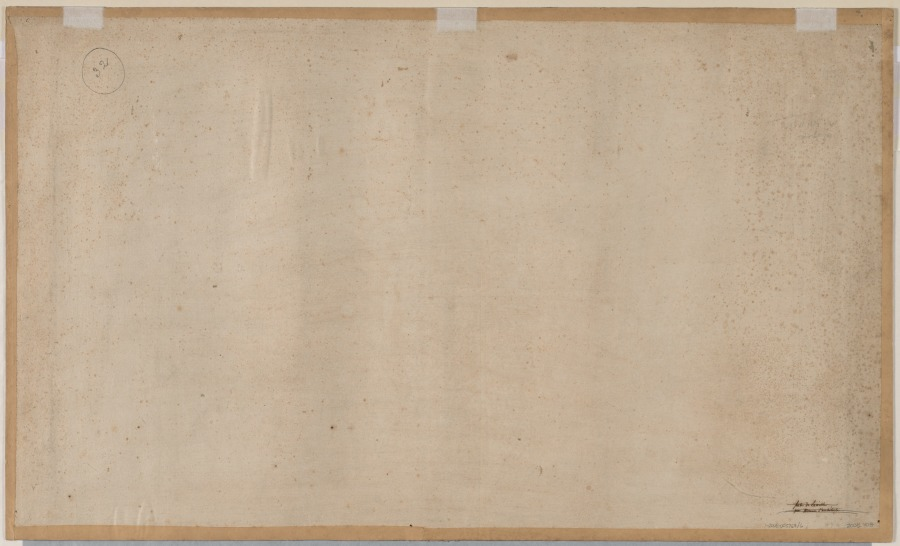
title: Cross Section of the Hôtel de Ville Seen in Perspective Showing the Decoration and Illumination of the Courtyard and Rooms Created on the Occasion of the Ball Given the Night of August 30 and 31, 1739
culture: France, 18th century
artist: Jacques-François Blondel (French, 1705–1744)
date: 1739–1740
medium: pen and black ink, brush and gray wash, and watercolor with gouache, over graphite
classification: Drawing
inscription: upper center in black: J. F. BLONDEL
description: This cross-section of a building allows a unique view into a French royal wedding. The partiers are dressed in costume and dance in the Parisian town hall. No expense was spared in the lavish celebration, from flowers to drinks to the elaborate false ceiling painted to look like the sky.